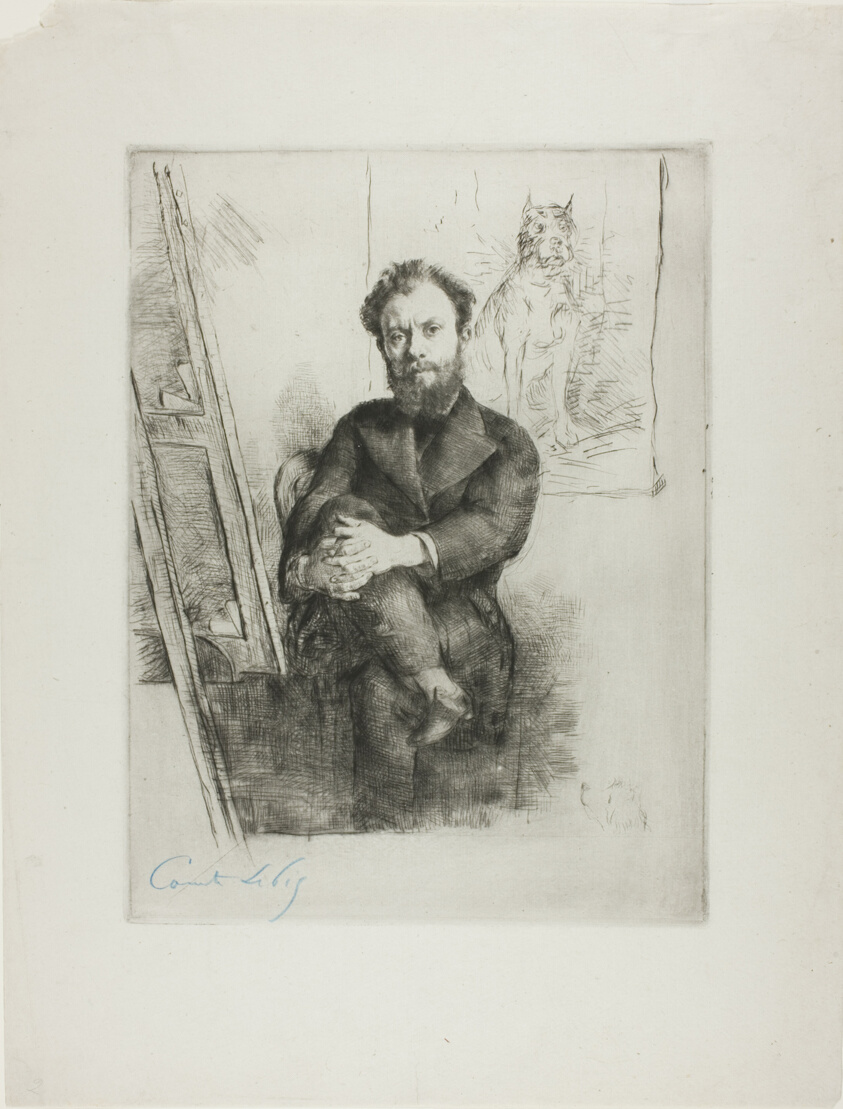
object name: Print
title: Portrait of Vicomte Ludovic Napoléon Lepic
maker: Marcellin Gilbert Desboutin (French, 1823-1902)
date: 1876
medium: Drypoint on ivory laid paper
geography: France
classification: drypoint; print; prints and drawing